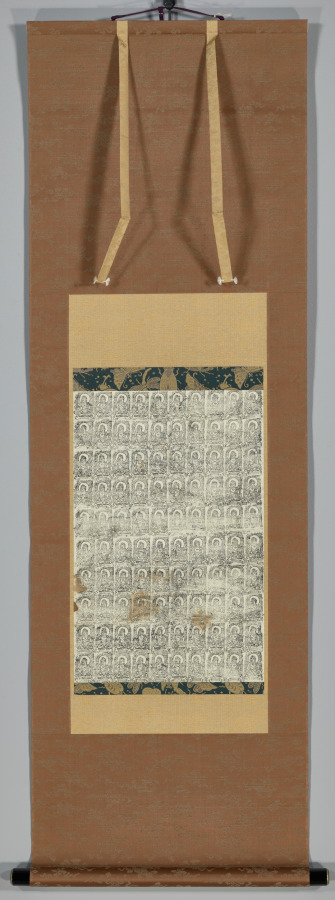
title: One Hundred Images of Fudo (Acala)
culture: Japan, Kamakura period (1185–1333)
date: 1200s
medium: Woodblock print mounted as a hanging scroll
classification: Print